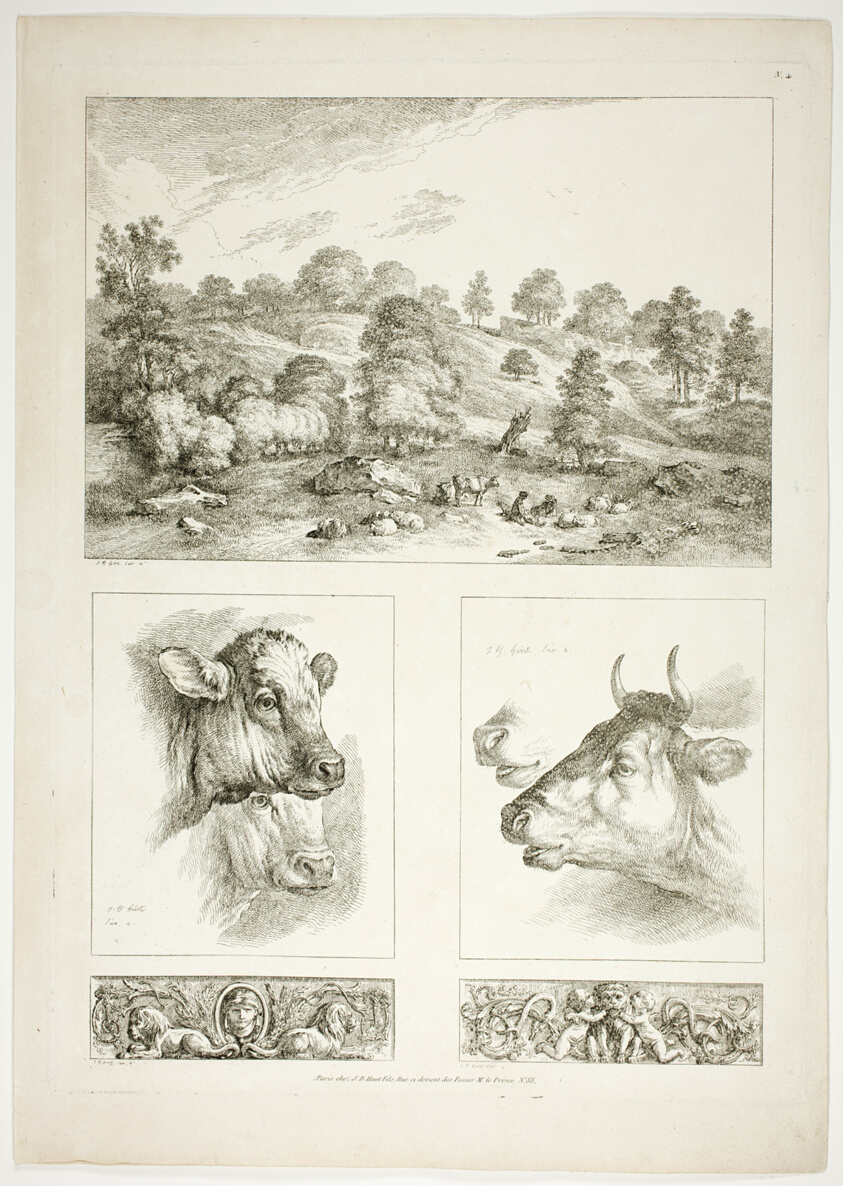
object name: Print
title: Plate Four of 38 from Oeuvres de J. B. Huet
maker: Jean Baptiste Huet (French, 1745-1811)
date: 1796–99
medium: Etching on paper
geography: France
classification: etching; print; prints and drawing